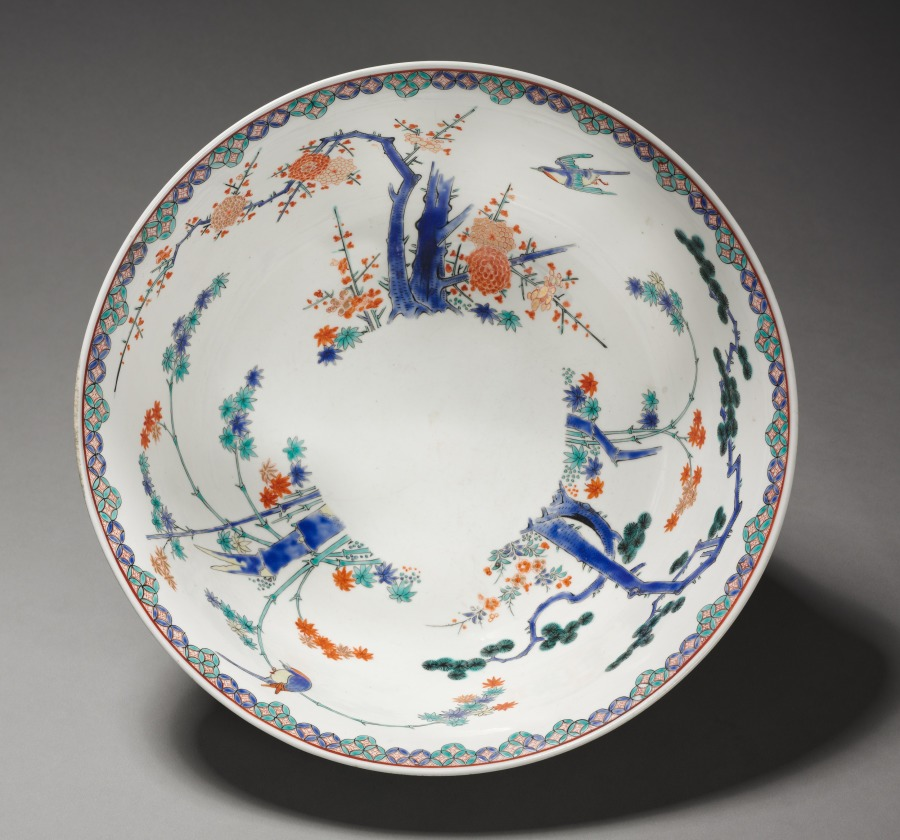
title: Pair of Bowls: Kakiemon Ware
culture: Japan, Edo period (1615–1868)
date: late 1600s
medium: Imari ware porcelain with overglaze enamel and gold decoration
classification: Ceramic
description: The Chinese style of decoration identifies this bowl as a product made for the markets in England, Holland, France, and Germany. Here, kakiemon potters rearranged the Chinese literati motifs of the plum, pine, and bamboo. Such kakiemon ware inspired domestic porcelain production in Europe in the 1700s–1800s.